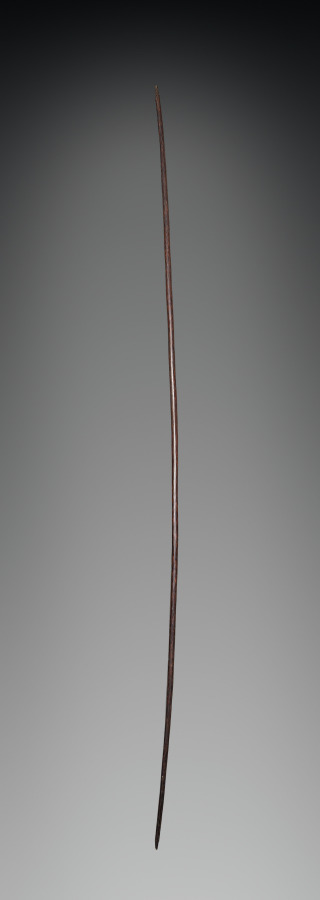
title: Bow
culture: Philippines, probably Luzon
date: before 1922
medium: wood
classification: Arms and Armor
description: This long, slender bow is carved from a single piece of dark hardwood. It has a smooth, undecorated surface and a gentle natural curvature. Shallow grooves are cut into each end to secure a bowstring.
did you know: The bow’s simple, functional design is characteristic of the Aeta (or Agta) people of the island of Luzon in the northern Philippines.